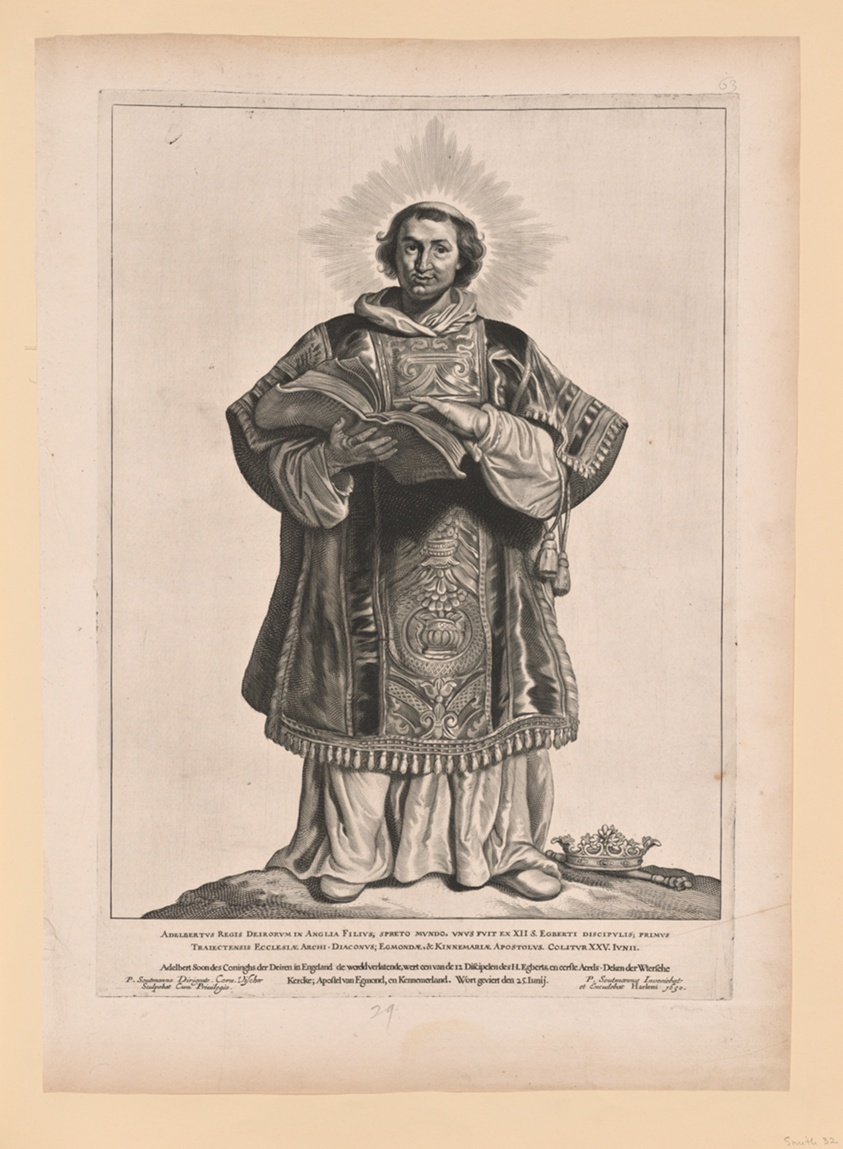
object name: Print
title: Saint Werenfridus, from Saints of the North and South Netherlands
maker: Cornelis Visscher (Dutch, c. 1629-1658); after Pieter Claesz. Soutman (Dutch, c. 1580–1657)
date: 1650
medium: Etching and engraving on paper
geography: Netherlands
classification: engraving; paper; print; prints and drawing